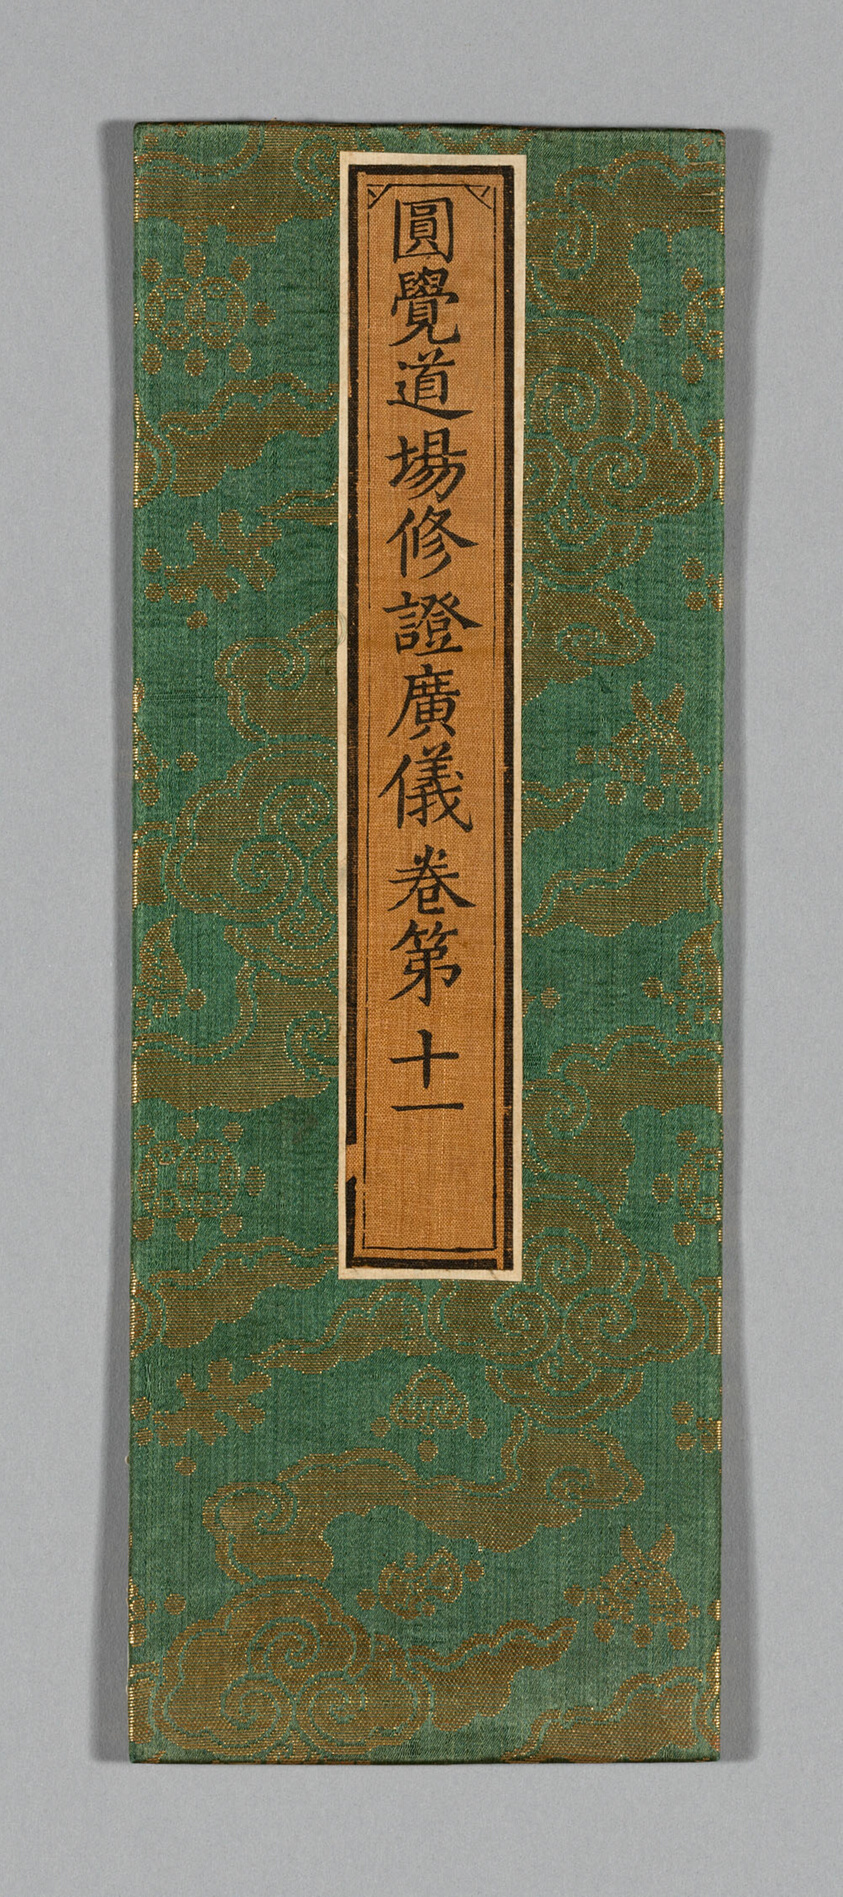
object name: Textile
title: Sutra Cover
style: ming, Chinese (culture or style), East Asian, asian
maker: China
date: Ming dynasty (1368–1644), c. 1590's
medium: Silk and gold-leaf-over-lacquered-paper strips, warp-faced 4:1 satin weave with supplementary patterning wefts bound in weft-float faced 1:4 satin interlacings; label: silk, plain weave; painted with ink; over paper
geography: China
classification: textile; weaving